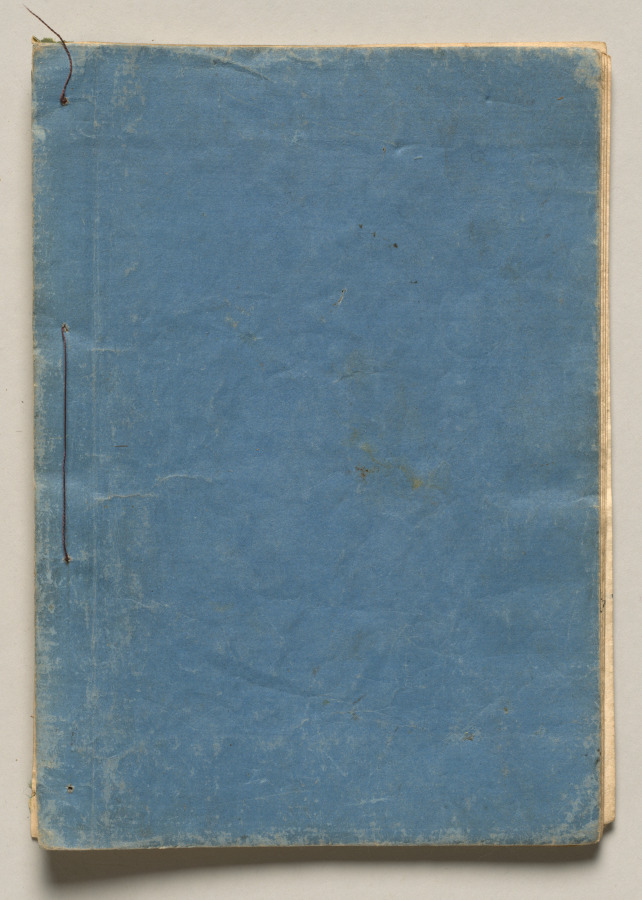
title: Volume Four of People of Japan in Light Verse (Kyōka)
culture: Japan, Edo period (1615–1868)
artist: Utagawa Hiroshige (Japanese, 1797–1858)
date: 1857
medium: Woodblock-printed book; ink and color on paper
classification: Bound Volume